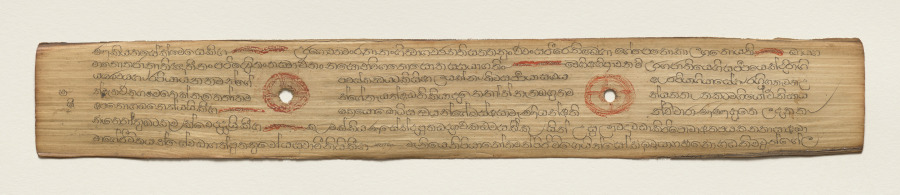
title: Leaf from a Buddhist Manuscript (recto)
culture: Sri Lanka, Singhalese, Late 17th century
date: c. 1700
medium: fiber paper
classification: Manuscript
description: Palm leaf material is still used for manuscripts in Sri Lanka. The palm leaves are prepared first by boiling them, drying them in the sun, and then rubbing them with oils. Scribes then use a metal stylus to incise the text. Then charcoal powder is wiped across the pages, filling in only the inscribed lines.